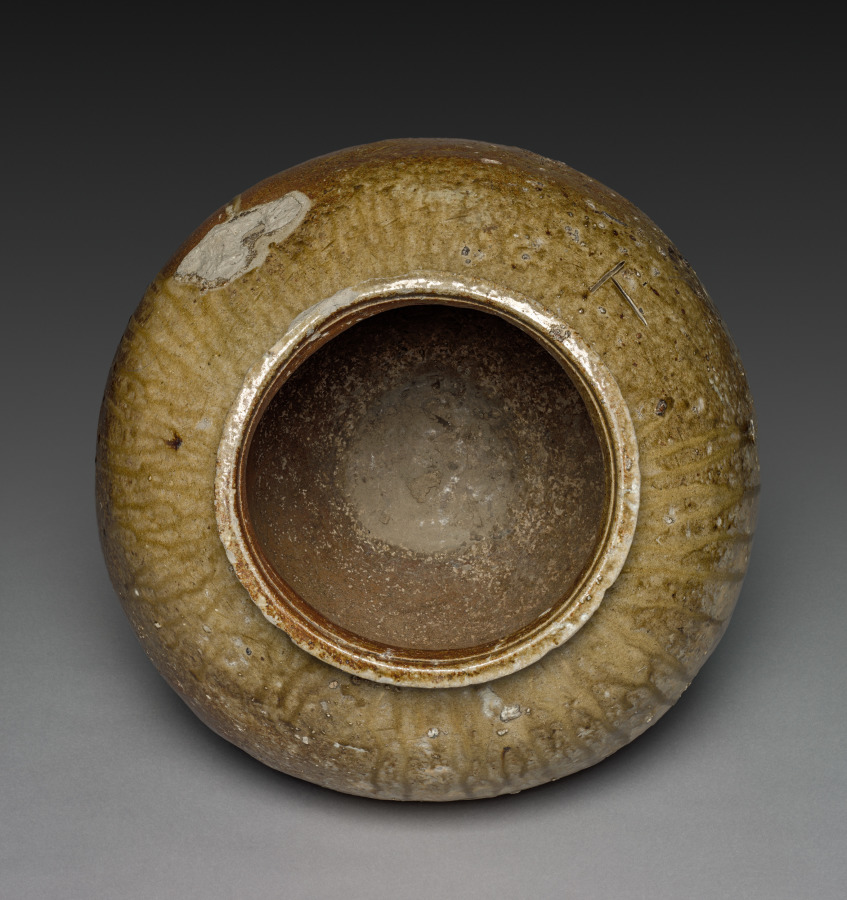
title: Storage Vessel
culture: Japan, Muromachi period (1392–1573)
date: 1400s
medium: stoneware with natural ash glaze (Echizen ware)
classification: Ceramic